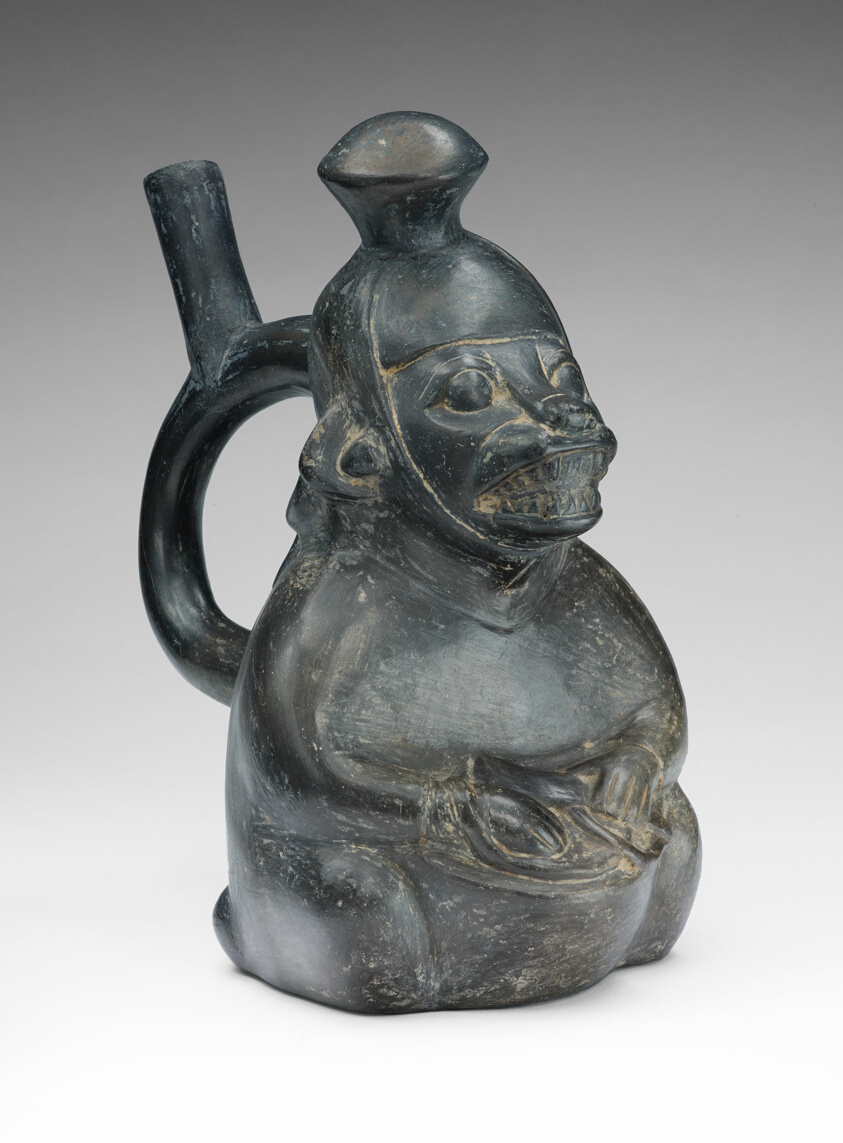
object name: Vessel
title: Vessel in the Form of a Masked Drummer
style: moche, americas, andes, Arts of the Americas, andean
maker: Moche (Chimbote, Santa Valley, north coast, Peru)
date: 100 BCE–500 CE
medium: Ceramic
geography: Santa Valley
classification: earthenware; ceramics; vessel; art of the americas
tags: musicians, figures (representations), masks